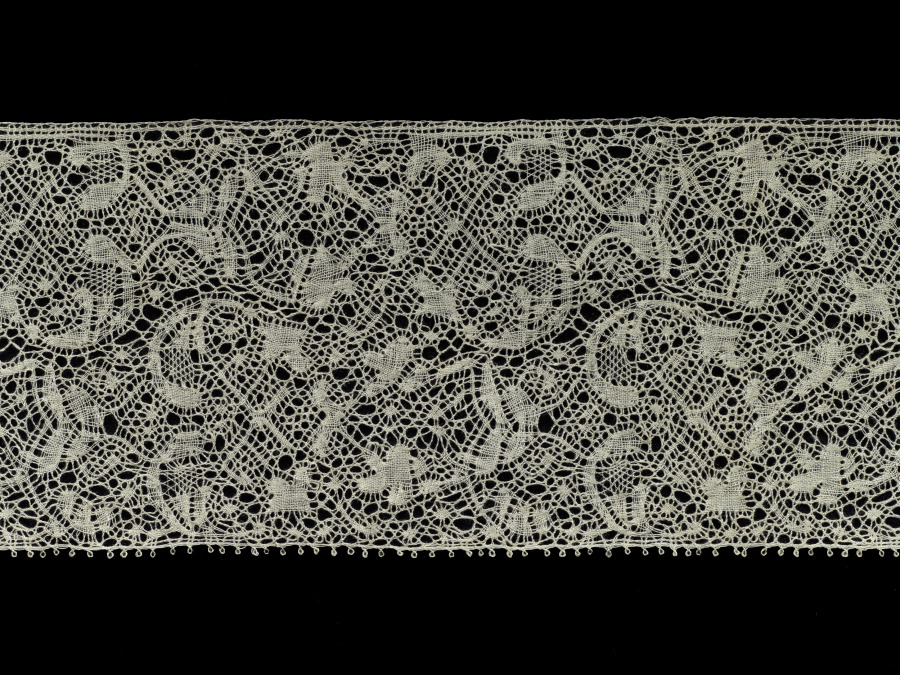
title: Lace Edging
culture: Belgium, Binche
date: 1900–1935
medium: Linen: bobbin lace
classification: Lace